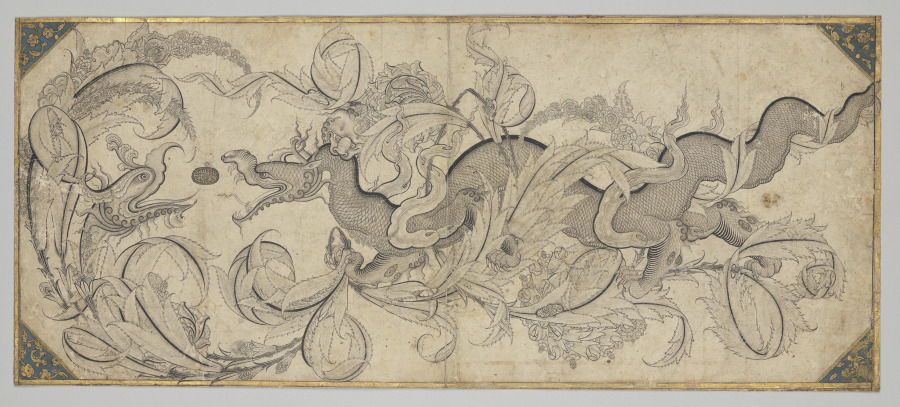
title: Dragon in foliage with lion and phoenix heads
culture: Ottoman Turkey, Istanbul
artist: attributed to Sahkulu (Turkish, active 1526–56)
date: mid-1500s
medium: Ink, gum tempera, and gold on paper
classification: Drawing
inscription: [stamp between dragon and phoenix, in Naskh script] And I commit my case unto God. [Qur’an 40:44]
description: A dragon lunges toward a pearl in the form of a seal inscribed with a verse from the Koran: “And I commit my case unto God” (40:44). In his front claw, the dragon grasps two flowering branches that magically produce a variety of blooms, including a lion that bites the dragon’s neck and a phoenix, who competes for the pearl. Sahkulu was trained by Persian artists, as were many artists of Mughal India during the 1500s. He joined the Ottoman imperial painting atelier in Istanbul in 1526 and became the head in 1545.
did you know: The lion head and phoenix head are part of the foliage, like fantastical blossoms.